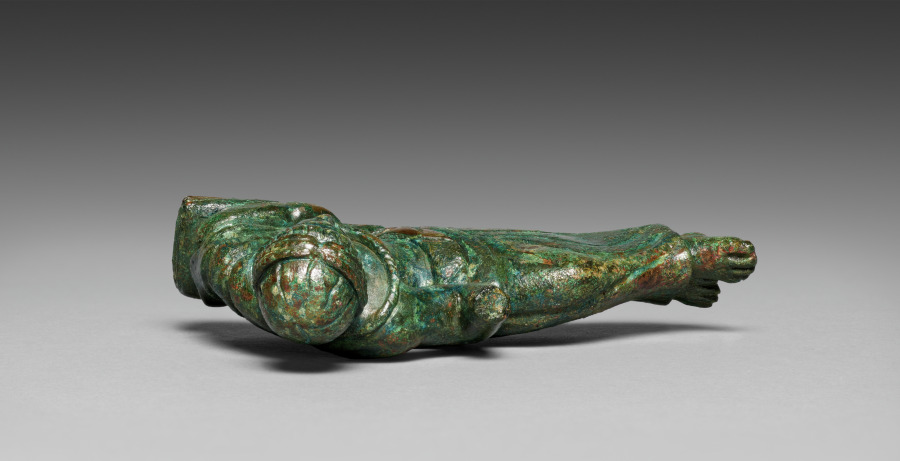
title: Vessel Ornament of Banqueter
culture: Etruscan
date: probably 400–375 BCE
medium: bronze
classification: Sculpture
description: This bronze banqueter figurine was one of six once adorning the rim of a large basin, now lost. Cast in molds with individualized details, most have grooves on their underside to attach to the basin. Minute traces of gilding remain on areas of clothing and skin (mostly visible only under magnification), suggesting that they may have been completely gilded. Two handles in the form of hippocampi, horses with serpentine tails, also belonged to the basin and are now displayed at the Michael C. Carlos Museum at Emory University. The basin may have been used to hold liquid for a banquet, or was perhaps funerary. This reclining bronze figurine’s left arm rests on the drapery covering his shoulder. His right arm is raised and broken at the wrist. Garlands rest on his head and chest. Traces of gilding remain in the garlands and drapery folds. The figurine is very similar to 1987.157, suggesting that he may have held a phiale mesomphalos, a shallow bowl used for wine libations to the gods.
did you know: Representations like this figurine suggest that Etruscan banqueters may have worn garlands made of flowers or leaves.